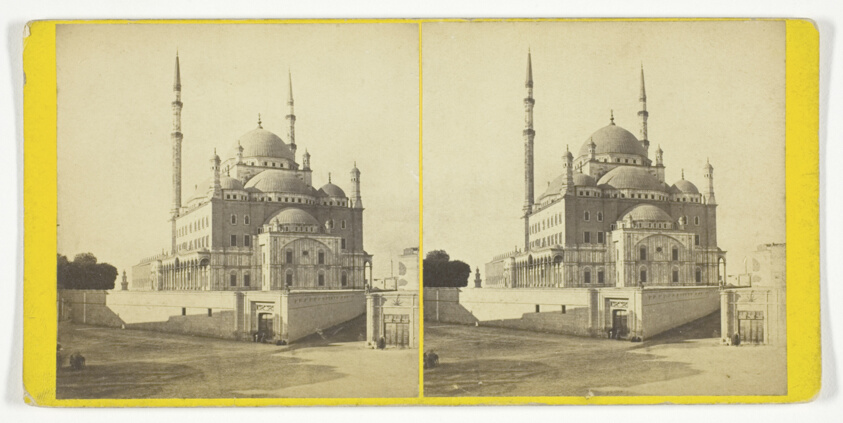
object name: Photograph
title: Egypt - Cairo, Mosque of Mahommed Ali, No. 109 from "Good's Eastern Series"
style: 19th century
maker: Frank M. Good; English, active 1860-1890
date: 1860/90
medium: Albumen print, stereo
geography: Cairo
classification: photography; photograph; albumen silver print; stereograph (albumen)